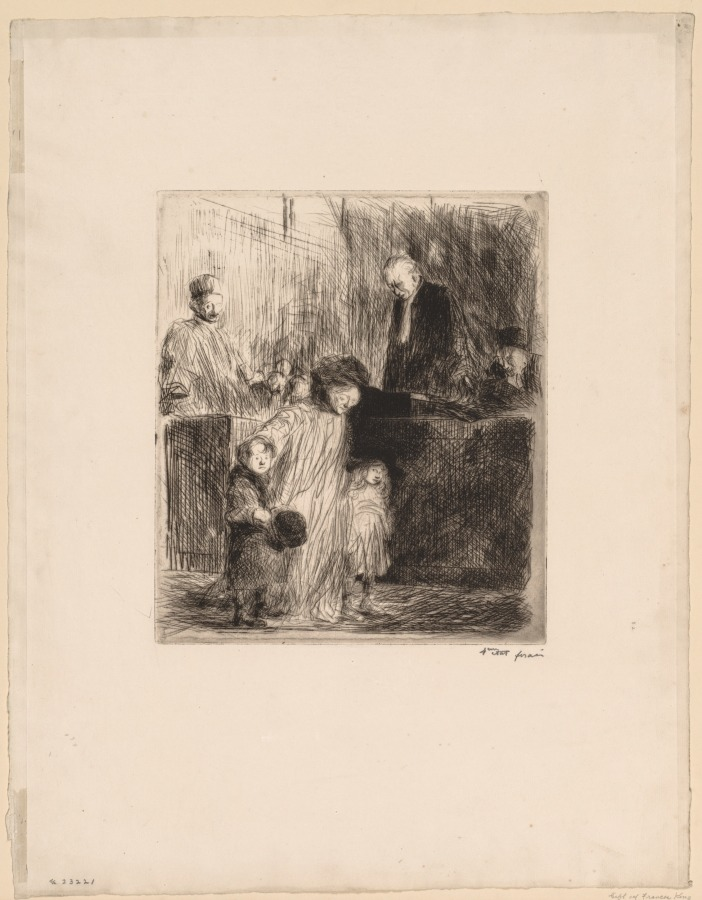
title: Sortie de l'Audience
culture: France, 19th-20th century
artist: Jean Louis Forain (French, 1852–1931)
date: 1909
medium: etching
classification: Print